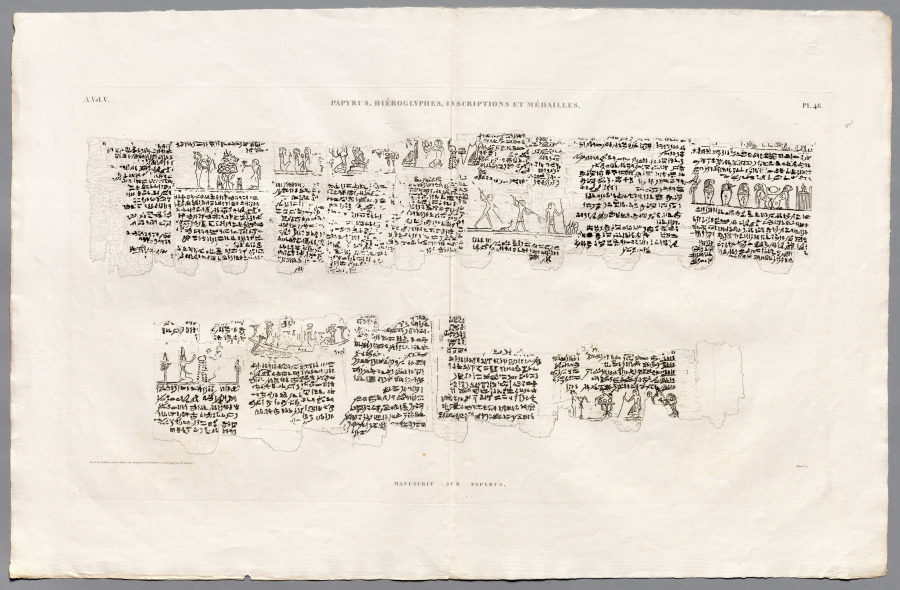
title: Description of Egypt: Thebes. Medynet-abou, Vol V, pl. 46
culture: France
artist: Baptiste Bigant (French)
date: c. 1822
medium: etching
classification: Print